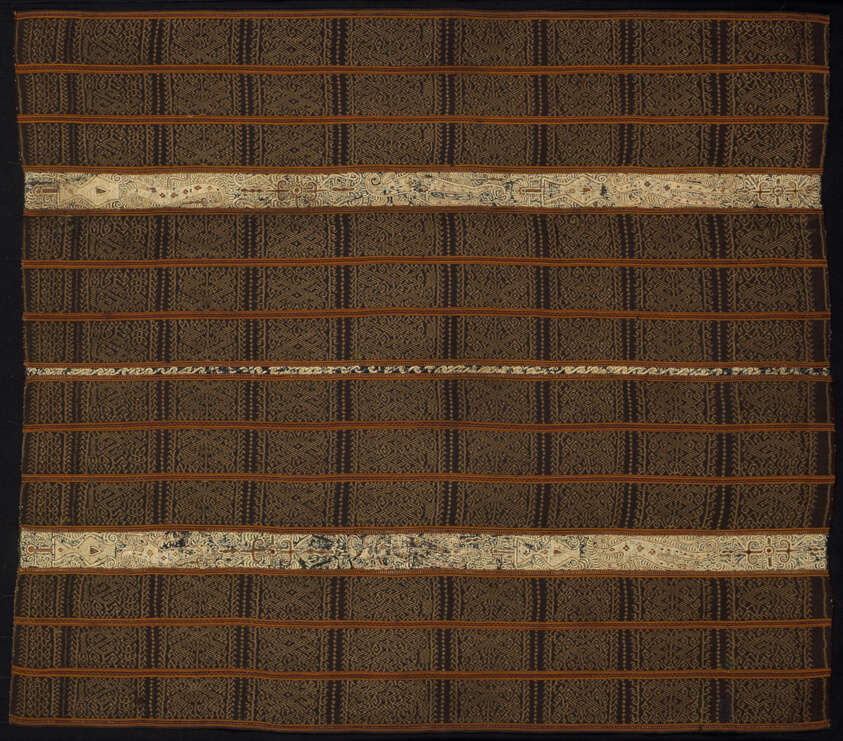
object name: Costume and Accessories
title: Woman's Ceremonial Skirt (tapis)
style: indonesian, sumatran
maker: Paminggir people; Indonesia, South Sumatra, Lampung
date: 19th century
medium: Two panels joined: stripes of cotton, warp resist dyed (warp ikat), plain weave with paired warps; cotton and silk, plain weave with supplementary brocading wefts: and stripes of cotton, plain weave embroidered with silk and gold-leaf-over-lacquered-paper-strip wrapped silk in back, chain, stem and surface satin stitches; laidwork and couching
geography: Indonesia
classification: textile; needlework (visual works); costume